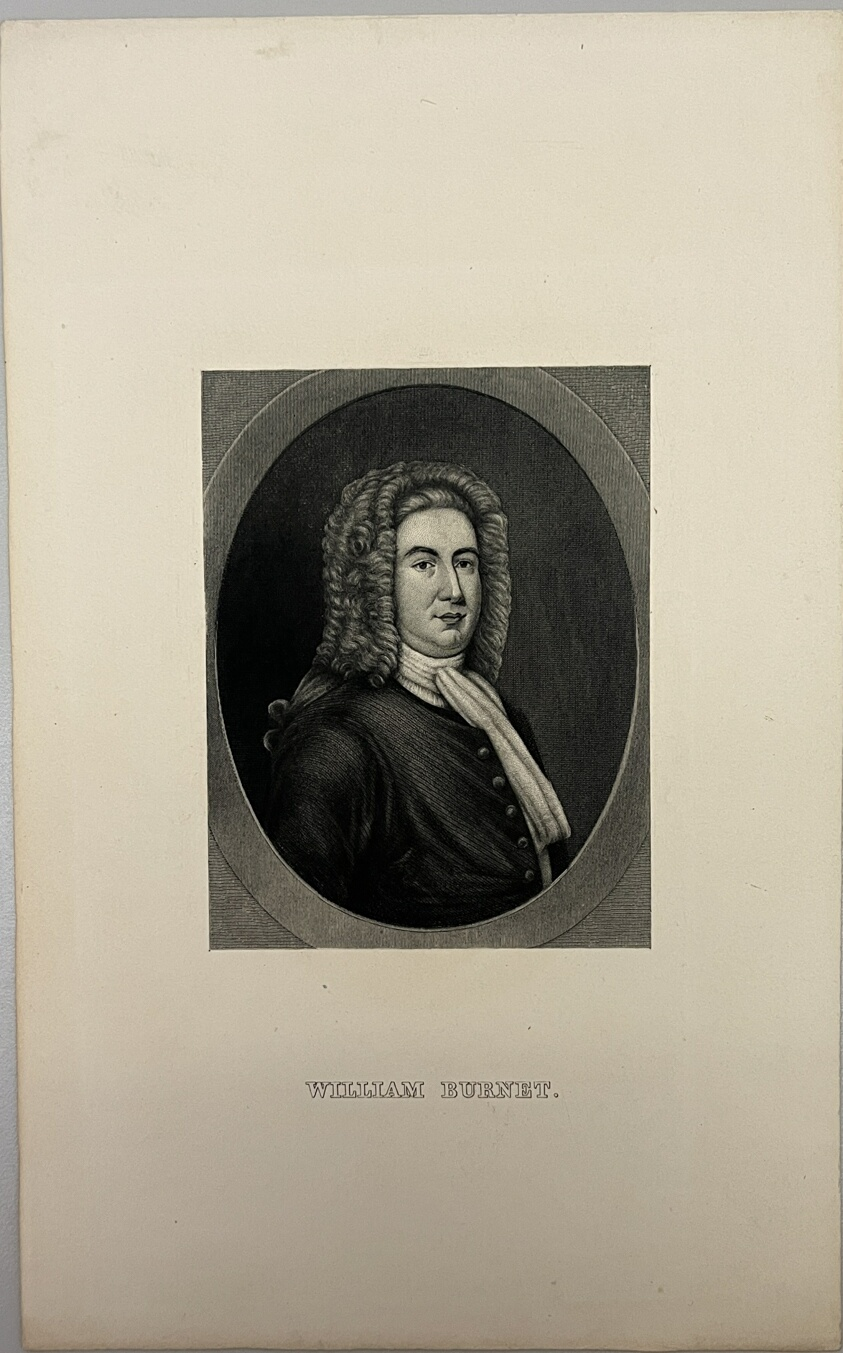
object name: Print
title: William Burnet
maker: Artist Unknown (Likely American or British, 19th century)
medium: Stipple engraving on paper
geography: United States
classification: reproduction; print; prints and drawing